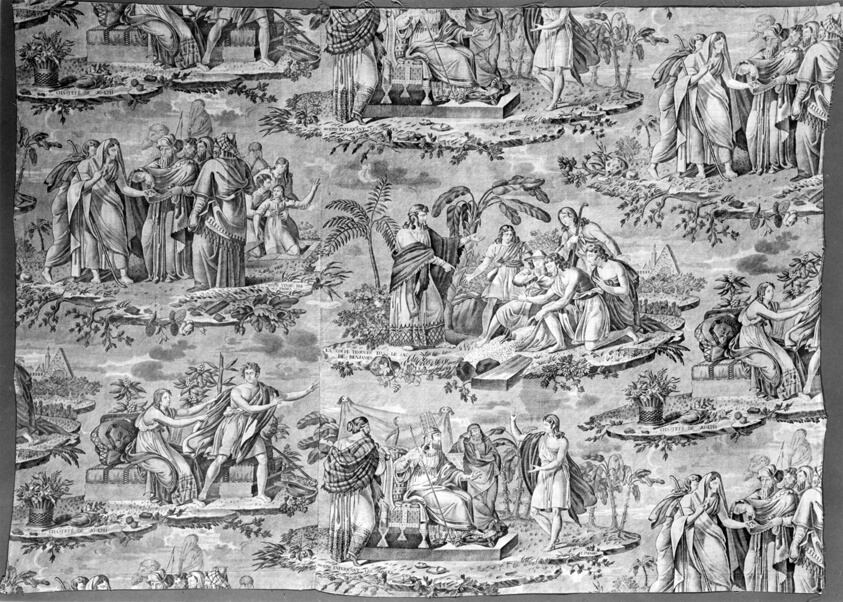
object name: Textile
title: The Story of Joseph (Furnishing Fabric)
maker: Designed by François Pieters (French, active c. 1820) after engraving by Tony Jahannot (French, 1803-1852) after Charles Abraham Chasselat (French, 1782-1843); France, Rouen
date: c. 1820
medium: Cotton, plain weave; engraved roller printed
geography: Rouen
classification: textile; weaving - printed; furnishing textile